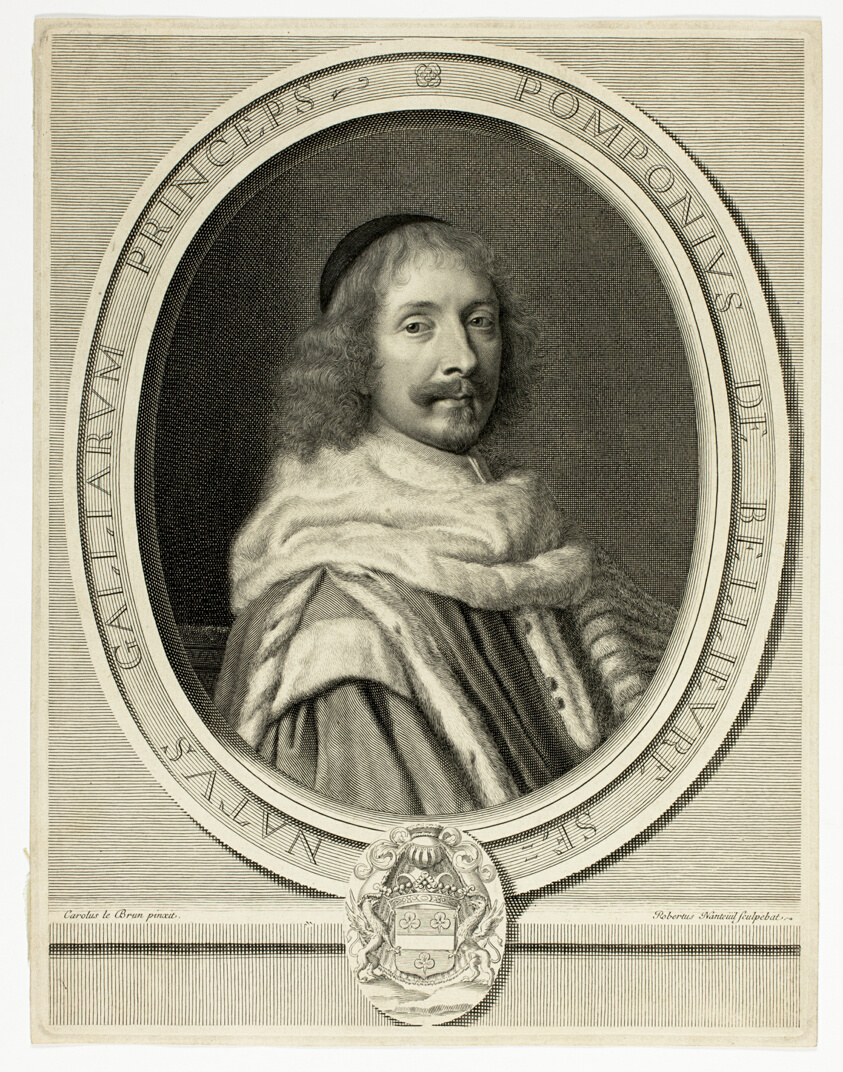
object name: Print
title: Pompone de Bellièvre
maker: Robert Nanteuil (French, 1623-1678); after Charles Le Brun (French, 1619-1690)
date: 1657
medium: Engraving on ivory laid paper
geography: France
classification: engraving; print; prints and drawing